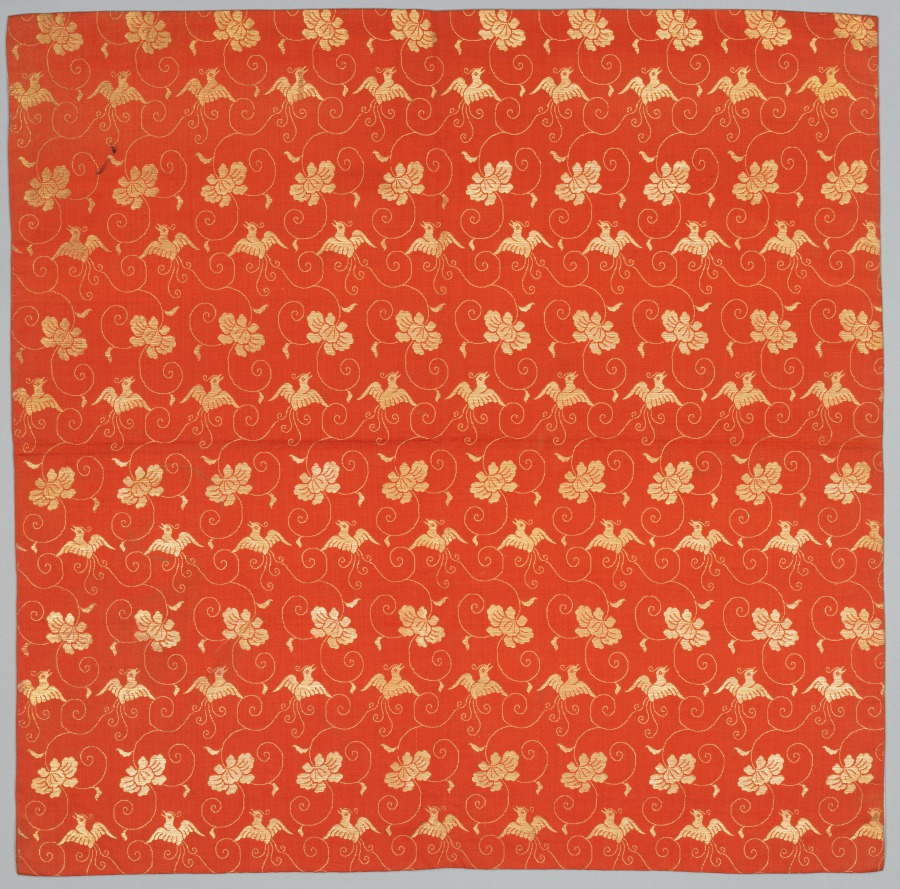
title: Brocaded Silk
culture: Japan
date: 1800s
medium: silk, metallic thread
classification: Textile